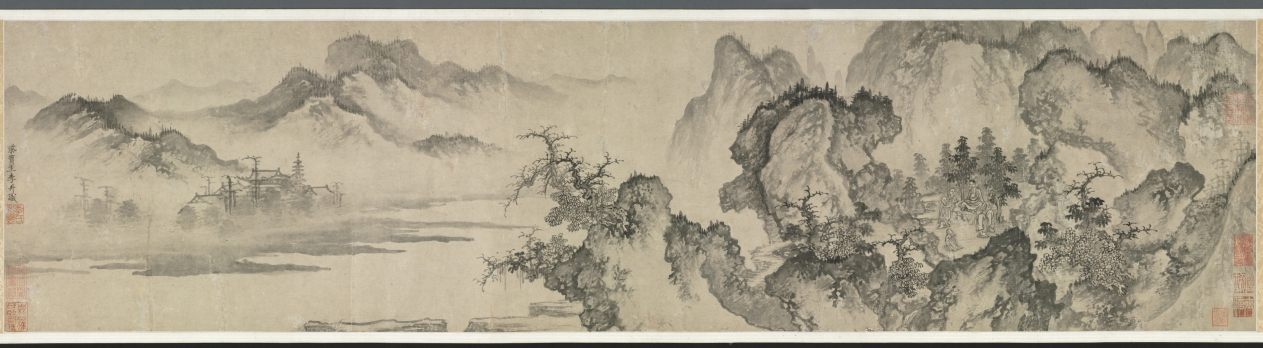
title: Buddha's Conversion of Five Bhiksu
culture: China, Yuan dynasty (1271–1368)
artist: Li Sheng (Chinese, active c. 1324–after 1375)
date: mid-1300s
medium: handscroll; ink on paper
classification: Painting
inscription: 紫篔生李升識 [印] 李氏子雲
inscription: 4 colophons and 12 additional seals: The "Heart" Sutra (Maha Prajnaparamita) text written by Wu Yuqing 吳餘慶 (active early 1400s); 2 seals of Xu Qianxue 徐乾學 (1631–1694); 3 colophons, one dated 1929 and two dated 1936, and 9 seals of Wu Hufan 吳湖帆 (1894–1968); 1 colophon, dated 1932, of Chen Dingshan; 1 seal unidentified.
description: This episode stems from the life of the historical Buddha, who, after his enlightenment, was initially hesitant about preaching his own doctrine. After much personal deliberation and prodding by deities, he finally relented. The first converts were the five guards who served him when he was still a prince. For Li Sheng, this is the pretext of the painting, which moves from the interaction of the bhiksu with the Buddha to a broader awareness of the vast surroundings of the scene.